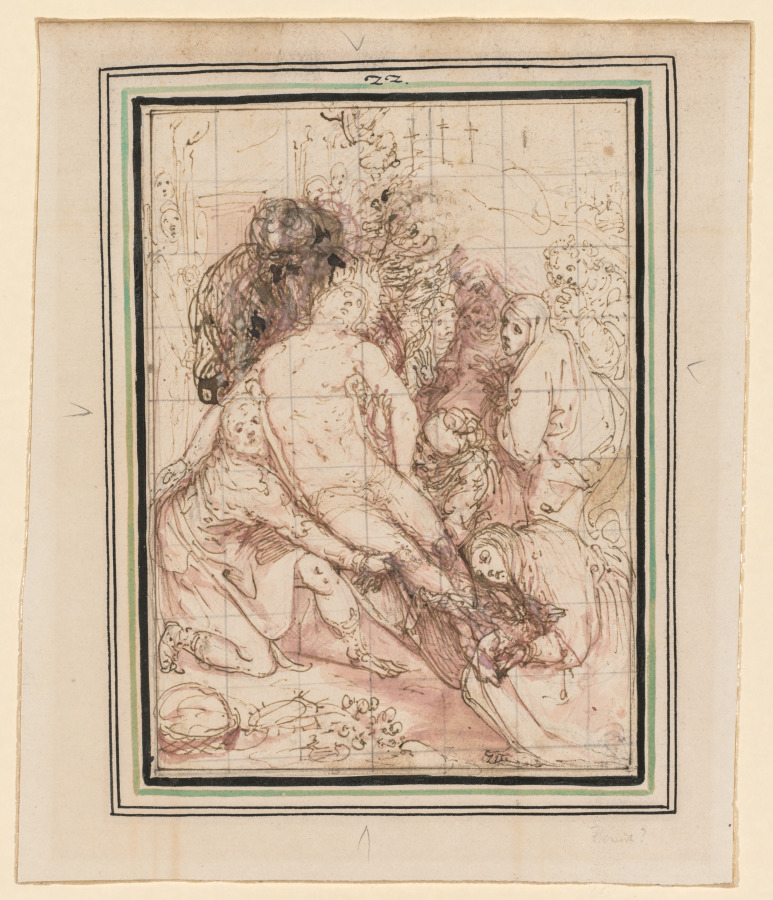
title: The Entombment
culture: Italy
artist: Giovanni de' Vecchi (Italian, 1536–1615)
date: c. 1596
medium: Pen and brown ink, brush and purple-pink wash with admixtures of white, and brush and brown wash, with graphite underdrawing; squared for transfer with graphite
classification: Drawing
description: By the end of the 1500s, Michelangelo’s treatment of the nude male had permeated artistic practice. Some artists (today called Mannerists) began to stray from the master’s grounding in human anatomy, emphasizing instead the expressive potential that Michelangelo brought to bear on the human form. To make an emotional impact, Giovanni de’ Vecchi created fluid figures with exaggerated proportions, such as the central figure of Christ that appears here. De’ Vecchi used pen and purplish watercolor to render the forms of the dead Christ surrounded by Saint John the Apostle, Nicodemus, Joseph of Arimathea, the grief-stricken Virgin Mary, Saint Mary Magdalene (at Christ’s feet), and their companions, who adoringly convey his body to the tomb in the upper left. This drawing was preparatory for an altarpiece for the church of Santa Prassede in Rome.